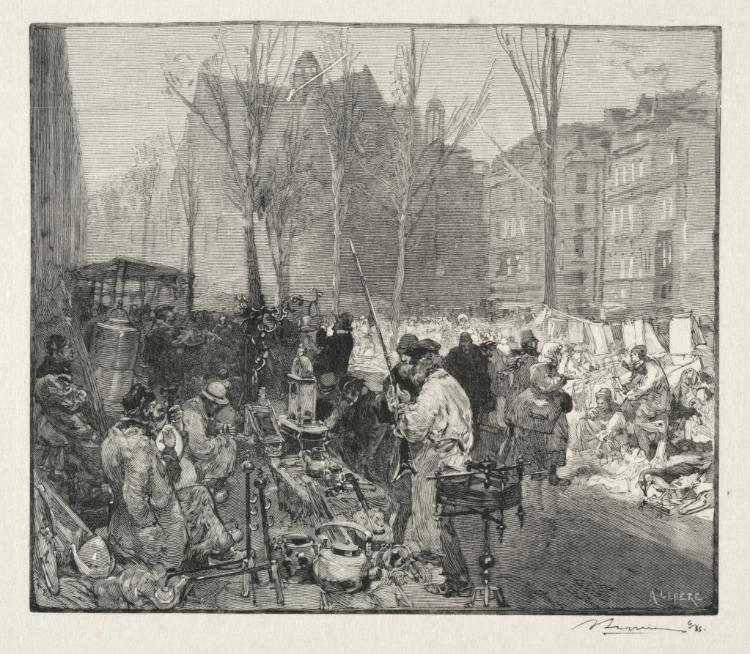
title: Marché à la Ferraille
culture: France, 19th-20th century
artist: Auguste Louis Lepère (French, 1849–1918)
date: c. 1870–1918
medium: wood engraving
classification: Print